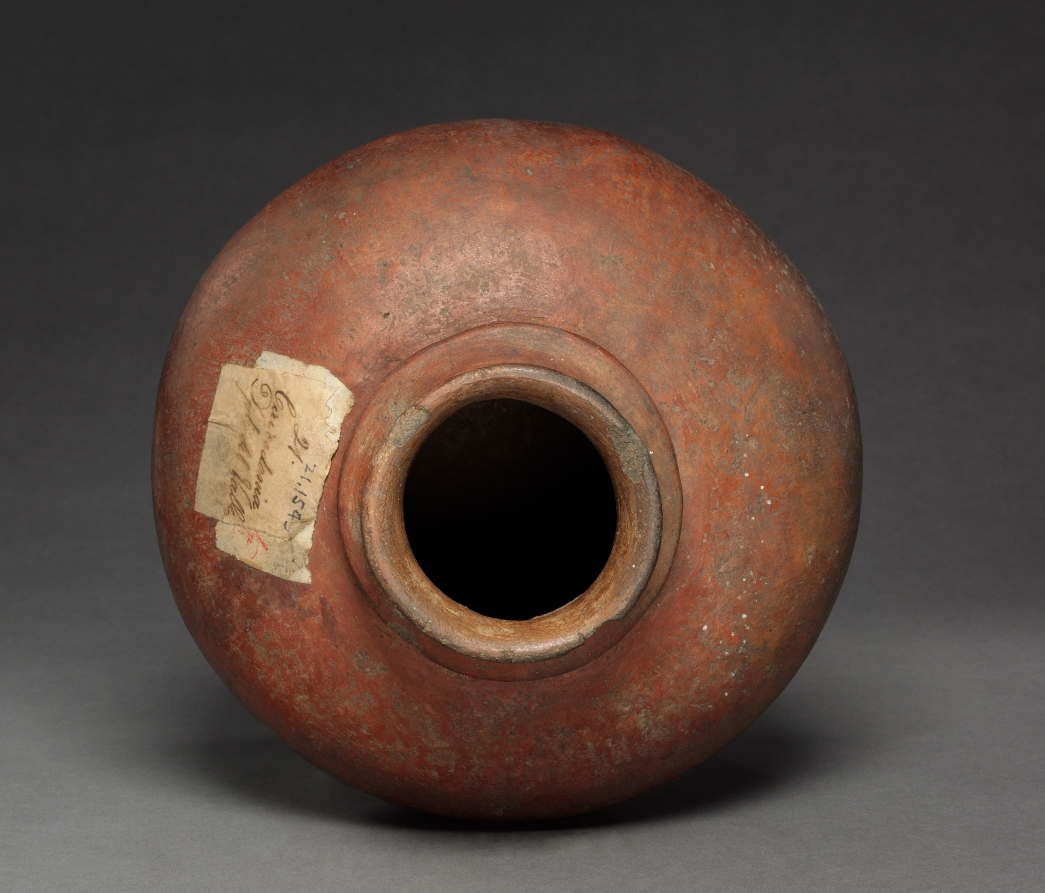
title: Vase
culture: Colombia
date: before 1921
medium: pottery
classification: Ceramic